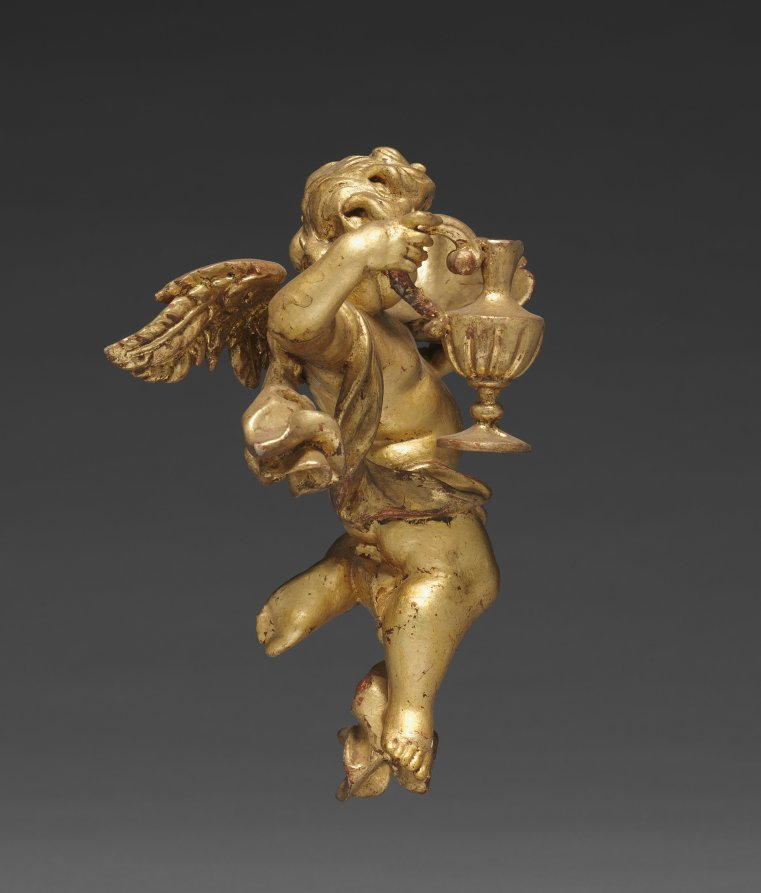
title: Altarpiece with Relics - Putto with Ewer, upper left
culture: Germany, Bavaria, 18th century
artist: Joseph Matthias Götz (German, 1696–1760)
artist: and Workshop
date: c. 1735–40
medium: gilded wood, with relics in niches: gilded wood, mother-of-pearl, ebony, red silk, gold wire, seed pearls, rock crystal, pen and ink on paper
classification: Sculpture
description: Götz covers every surface in gold leaf, giving each part of the object equal importance, rather than simply framing a central picture. In this distinctively Central European approach, figural narrative is subordinate to the overall ensemble. Götz designed this object to rest on top of an altar, probably in front of a larger painted or sculpted decorative scheme. The work contains relics seen through the small windows on the perimeter. These small remains of holy figures demonstrate the persistence of a medieval Catholic tradition well into the 1700s.